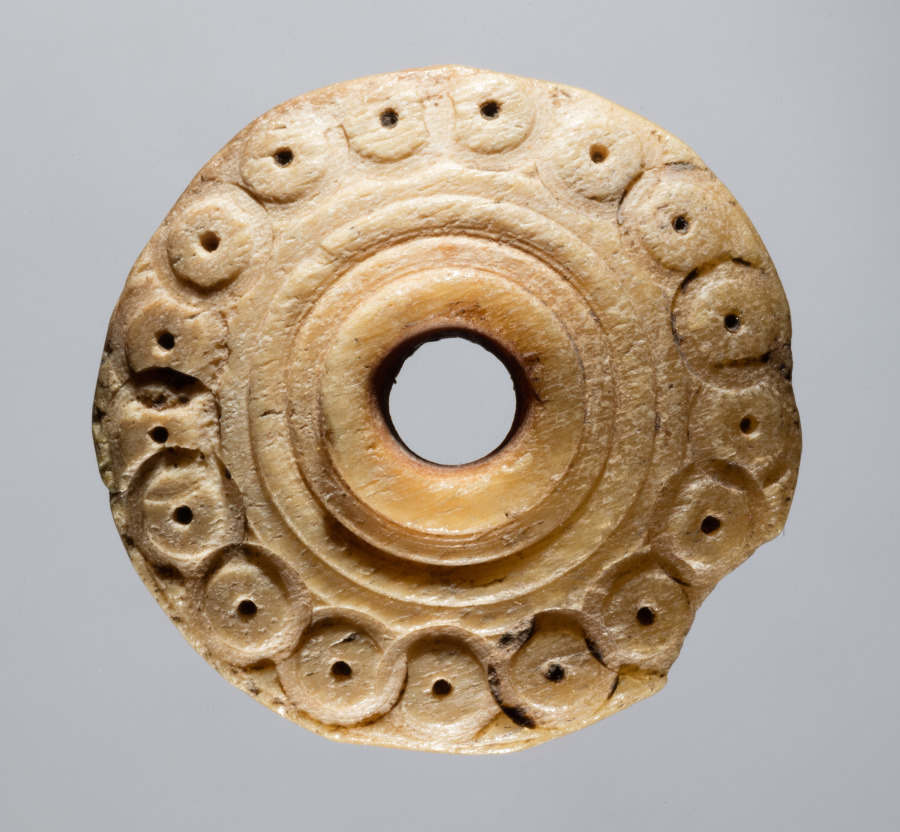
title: Spindle Whorl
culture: Iran, early Islamic period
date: 700s - 900s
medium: bone, incised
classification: Spindle Whorl